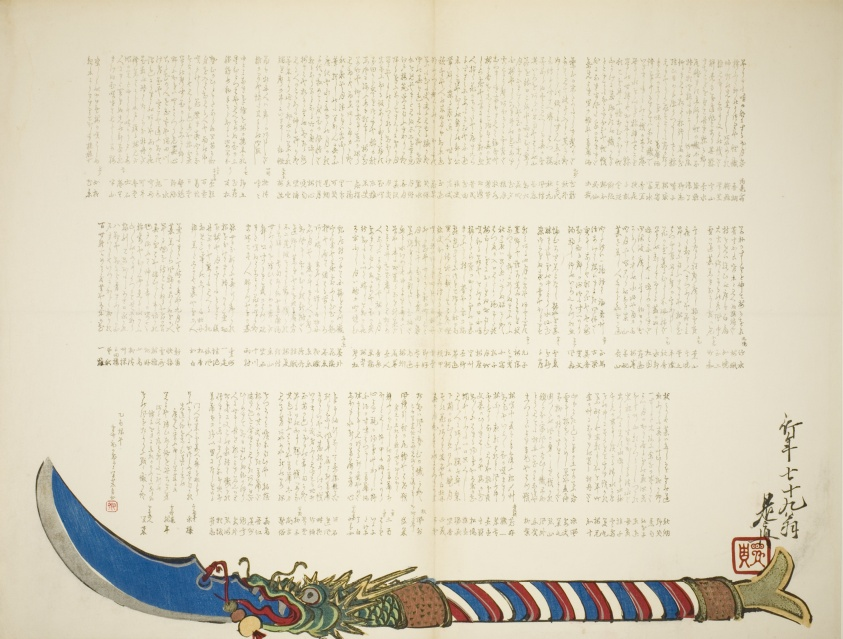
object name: Print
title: Dragon head halberd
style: Japanese (culture or style)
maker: Shibata Zeshin (Japanese, 1807-1891)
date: 1885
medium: Color woodblock print; surimono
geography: Japan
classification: woodblock print; print; asian art